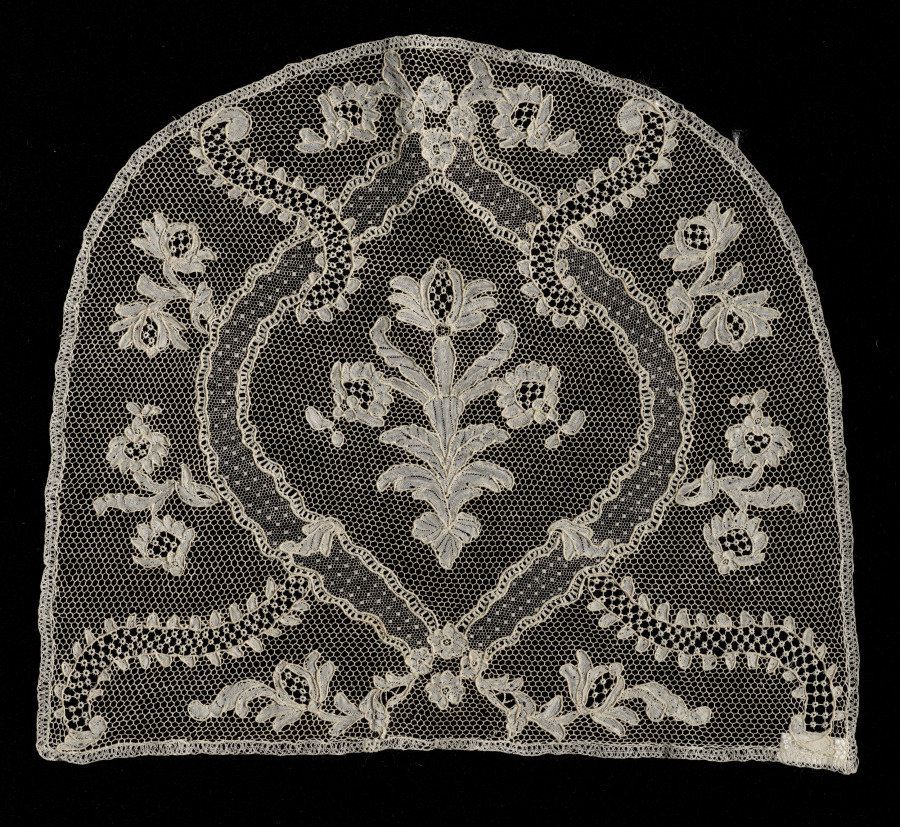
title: Lace Cap Crown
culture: France, Argentan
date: late 1700s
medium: Needle lace (Point de Argentan)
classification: Lace